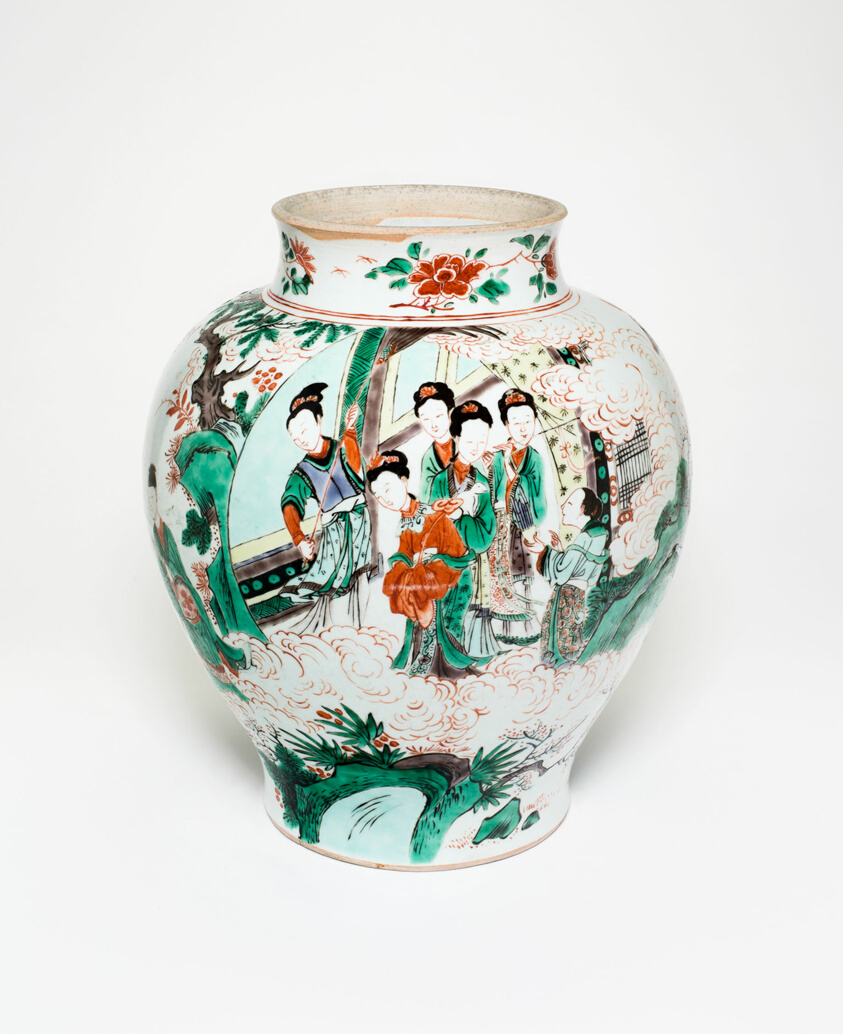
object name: Vessel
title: Jar with Figural Scenes and Poem Describing the Osmanthus and Moon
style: Chinese (culture or style)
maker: China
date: Qing dynasty (1644–1911), Shunzhi period (1644–1661), dated 1646, with later painted decoration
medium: Porcelain painted in overglaze enamels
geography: China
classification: porcelain; asian art; ceramics; vessel